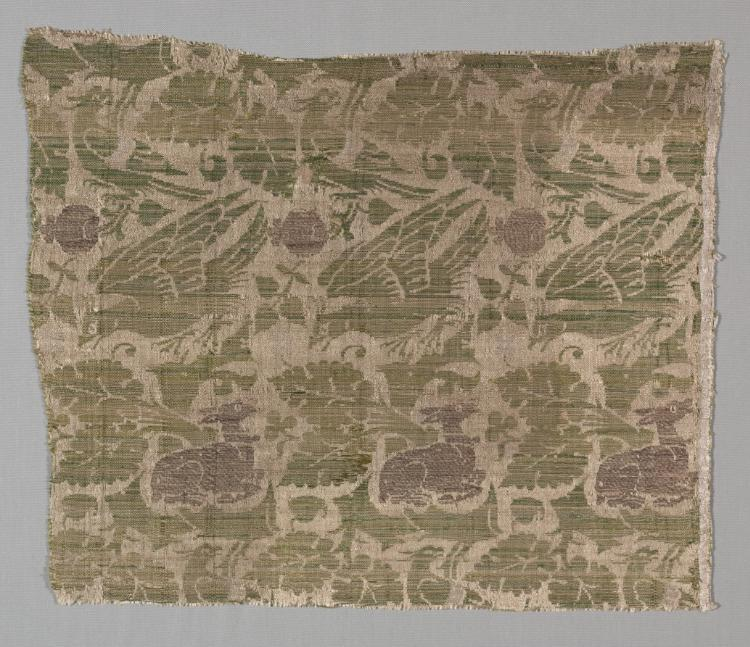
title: Silk and Gold Textile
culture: Italy, 15th century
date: 1420–1430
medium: lampas weave, silk and gold thread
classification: Textile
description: Lucca, Venice, Florence, Bologna, and Genoa are known to have been the principal silk weaving cities in Italy during the 14th and 15th centuries. It is not possible, however, to distinguish which silks were woven in each city. Silks like these were sold to royalty, nobility, and churches throughout Europe by Italian merchants in Bruges, Antwerp, Paris, London, and Avignon.